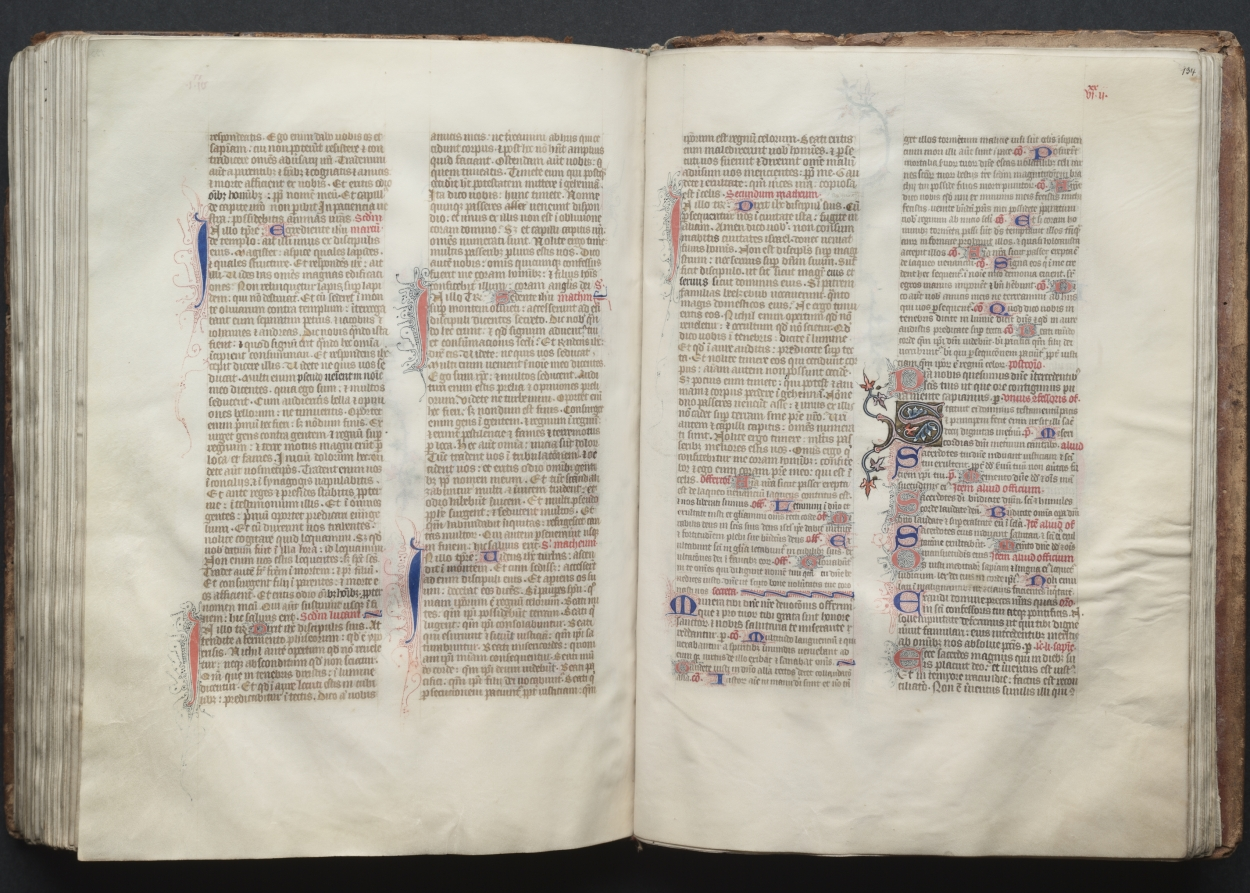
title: The Gotha Missal: Fol. 133v, Text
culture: France, Paris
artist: Master of the Boqueteaux (French)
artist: and Workshop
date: c. 1375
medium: ink, tempera, and gold on vellum; blind-tooled leather binding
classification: Bound Volume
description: The style and quality of this manuscript's decoration is typical of deluxe Parisian books made for aristocratic or royal patrons. Most of the book's decoration appears to be the work of the Master of the Boqueteaux, an artist active at the court of King Charles V (died 1380). His style was apparently shared by a number of book illuminators working in and around Paris. It is very possible that the Gotha Missal belonged to Charles V, but is not provable because the manuscript has no royal portraits and lacks a colophon. Given the book's magnificent decoration, however, it would seem that it was produced for a Valois prince, if not for the king himself. The manuscript receives its name from the German dukes of Gotha, its later owners.